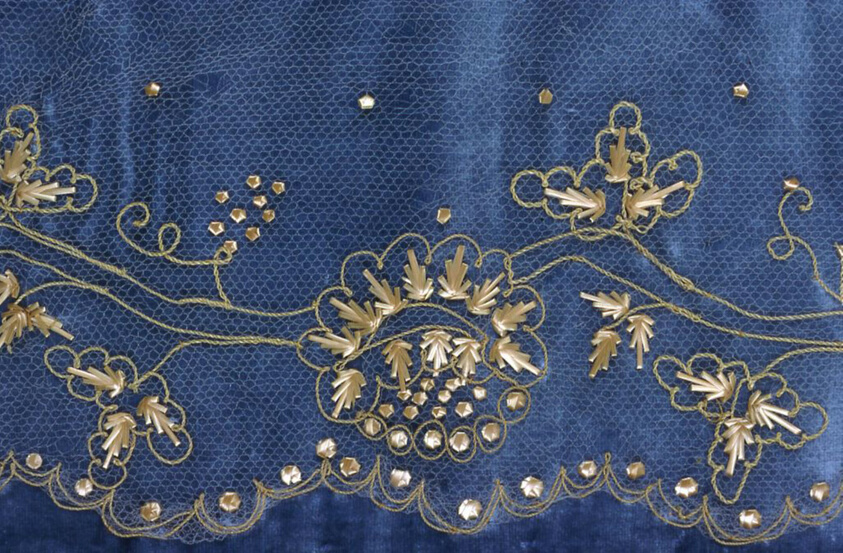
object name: Textile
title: Border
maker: France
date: c. 1860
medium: Silk, machine-made twist net; embroidered with straw in fishbone and running stitches; knotting and wrapping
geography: France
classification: textile; needlework (visual works)